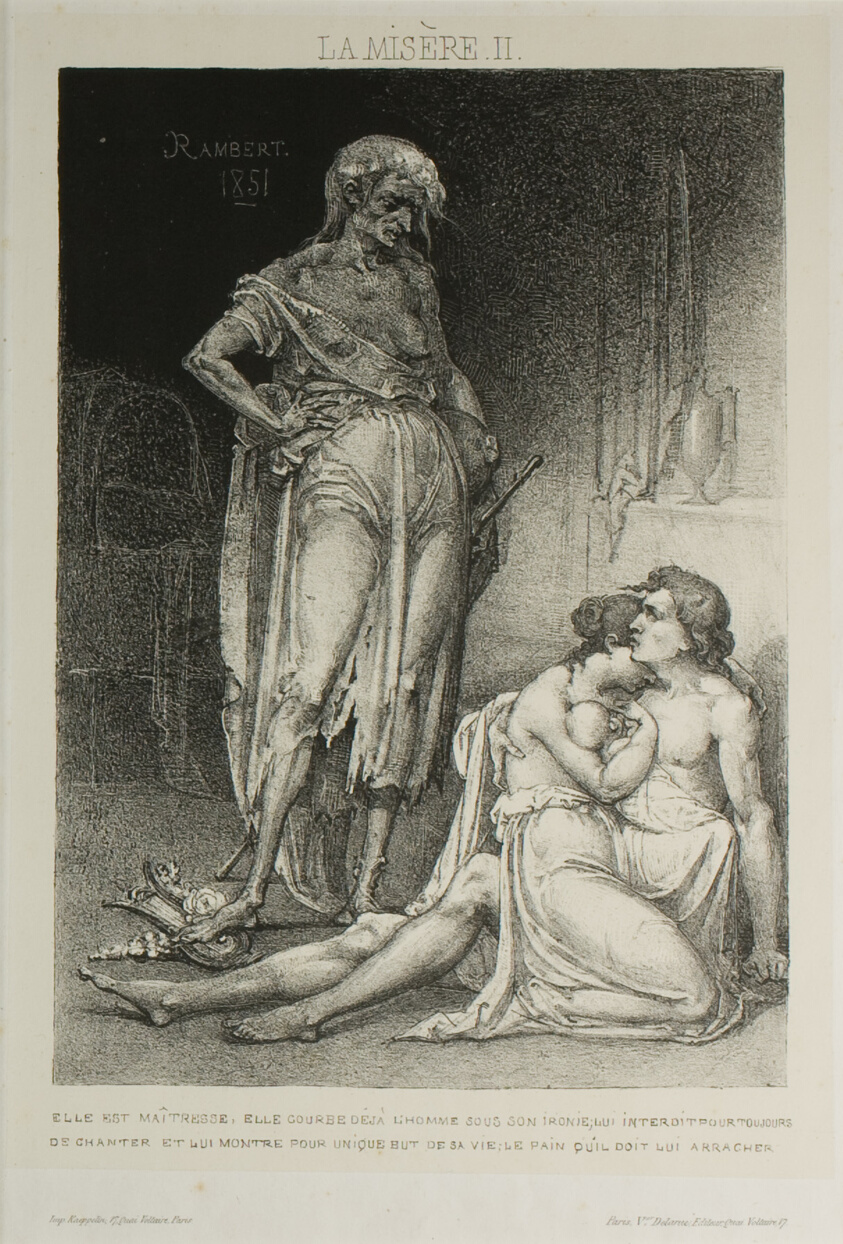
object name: Print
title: Plate Two from Misery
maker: Charles Rambert (French, active 1836–1867); printed by Kaeppelin; published by Victor Delarue (French, 19th century)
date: 1851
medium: Lithograph in black on cream China paper, laid down on ivory wove paper (chine collé)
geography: France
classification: lithograph; print; prints and drawing